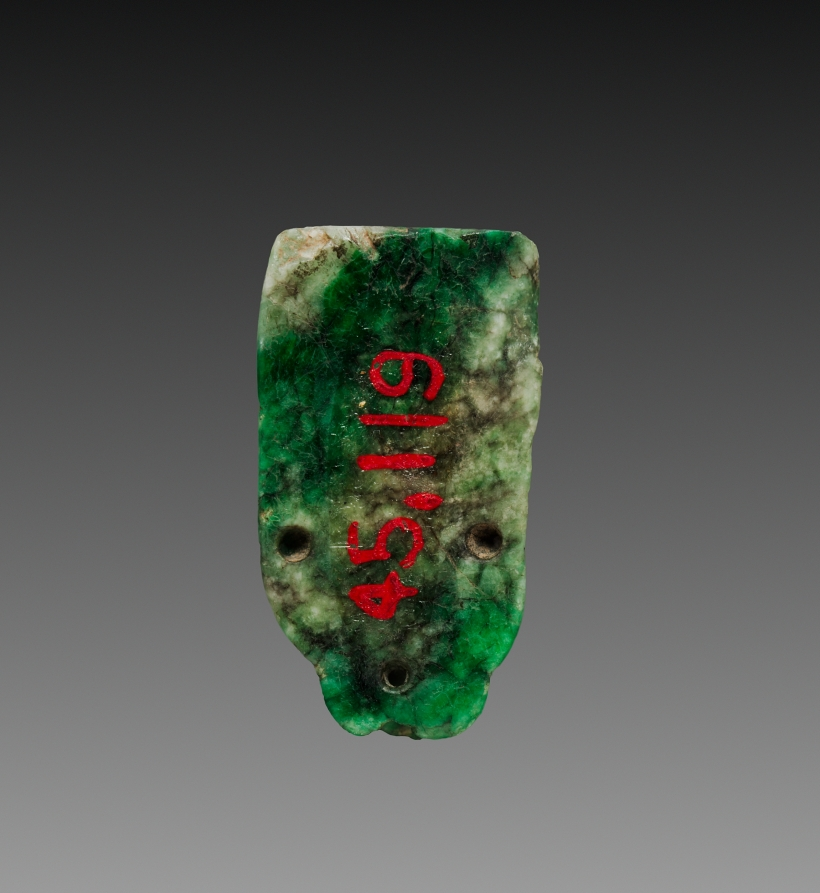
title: Head Ornament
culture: Honduras, Copan, Maya, 7th-10th Century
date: c. 600–900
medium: jade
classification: Jade